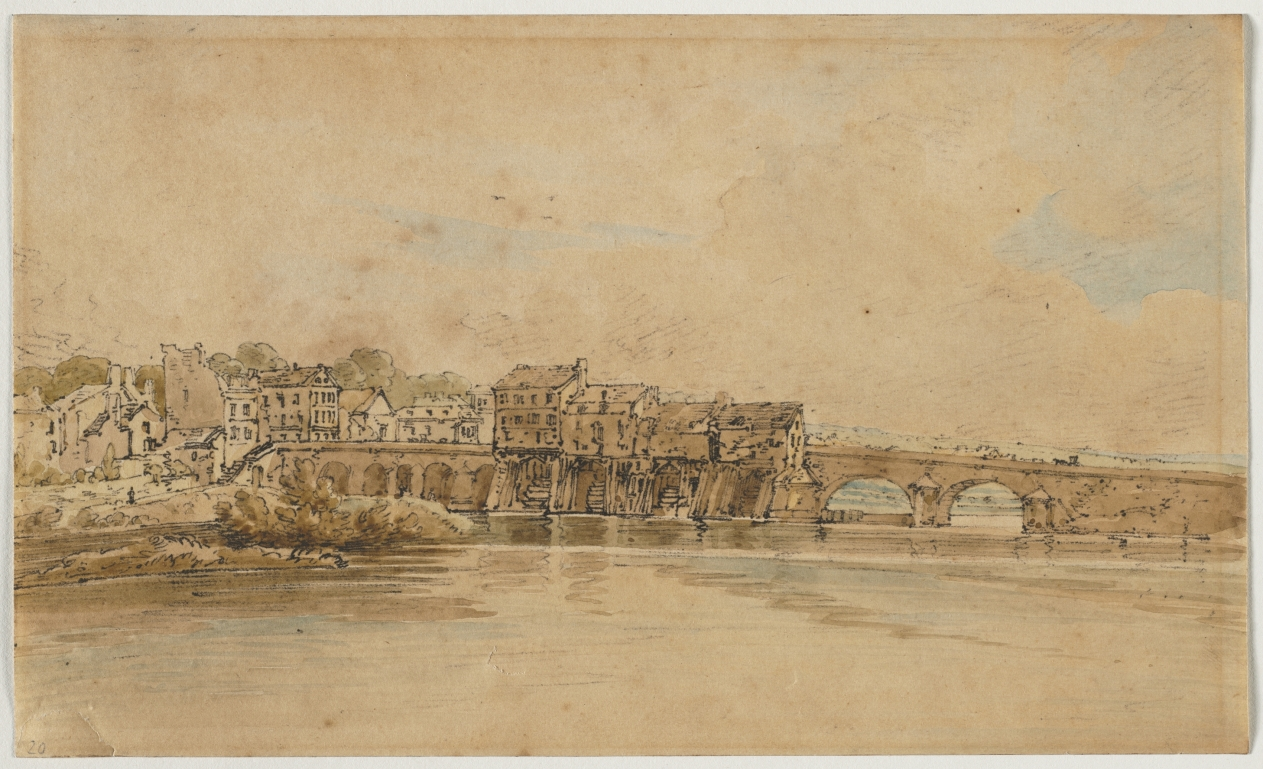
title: A Selection of Twenty of the Most Picturesque Views in Paris: On the Banks of the Marne below the Bridge at Charenton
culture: England, early 19th Century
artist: Thomas Girtin (British, 1775–1802)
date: 1802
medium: soft-ground etching with bistre wash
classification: Print